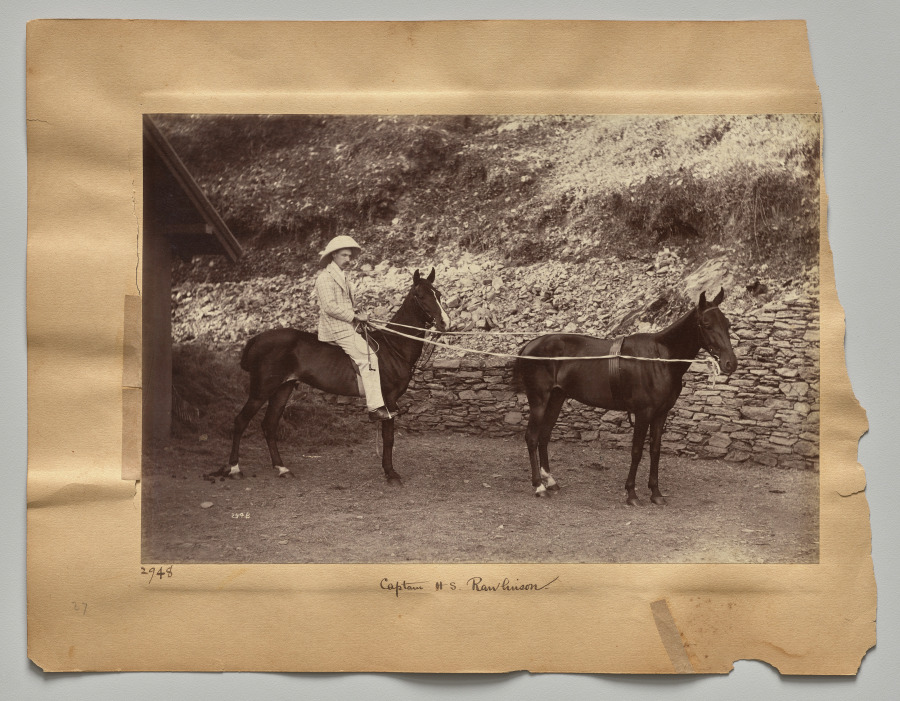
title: Captain H.S. Rawhinson (recto)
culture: India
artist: Raja Deen Dayal (Indian, 1844–1905)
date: c. 1882–87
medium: albumen print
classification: Photograph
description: These photographs are part of an album, now disassembled, of around 105 photographs taken in India between 1885 and summer 1887 that provide glimpses into the lives of the British colonial elite and royal and upper-class Indians. The museum holds another group of 37 pictures from this album (2016.266), which was probably commissioned by a British civil servant visiting or working in India around 1888 as a personal souvenir of his experiences there.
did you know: Raja Deen Dayal is regarded now, and was considered during his lifetime, to be India’s most important 19th-century photographer.